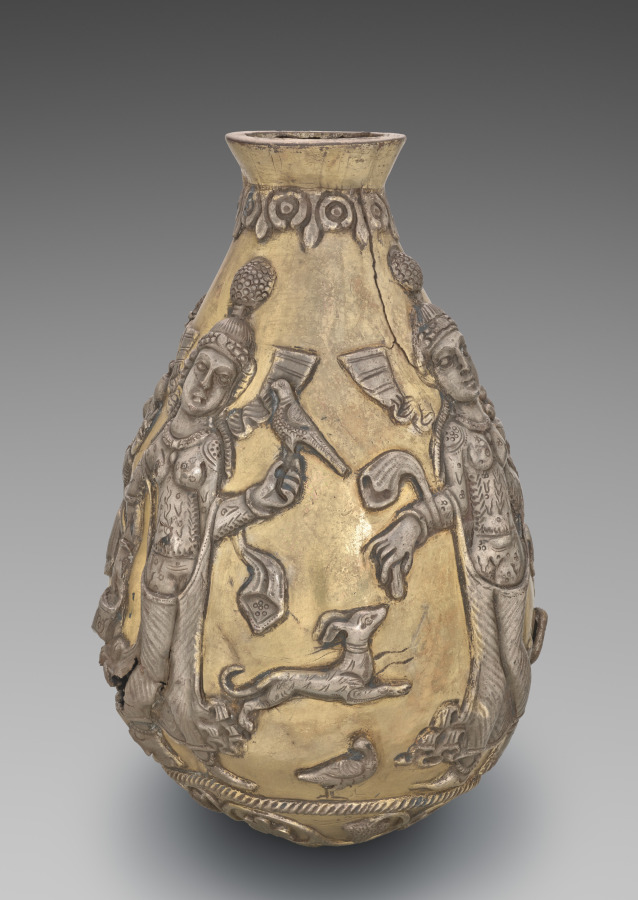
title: Anahita Vessel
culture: Iran, Sasanian Empire (224–651 CE)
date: 300–500 CE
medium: silver, cast, raised, repoussé, chased, and gilted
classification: Metalwork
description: These dancers may be sacred images of the Zoroastrian religion of the Sasanians or they may be bacchantes, followers of a cult of the Roman wine god, Bacchus, who was popular in the Near East.